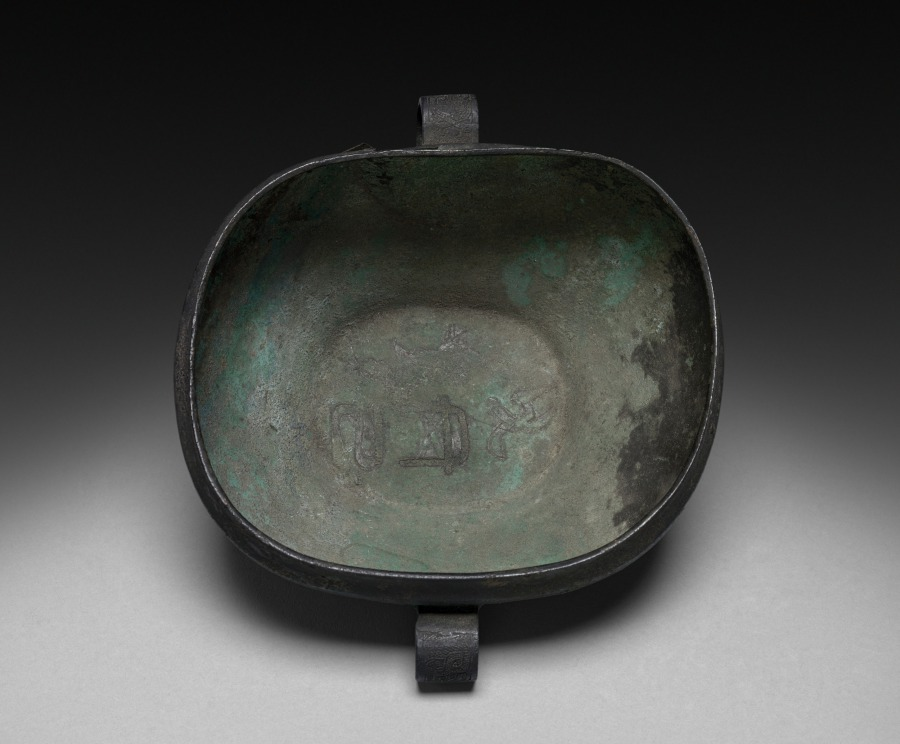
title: Bronze Dish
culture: China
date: before 1915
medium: bronze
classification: Metalwork